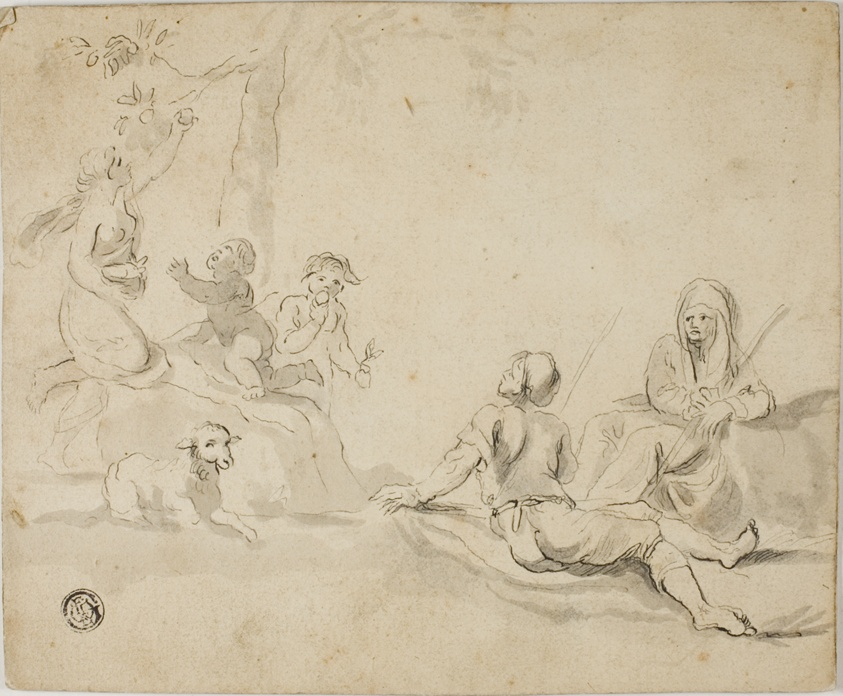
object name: Drawing and Watercolor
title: Apple Harvesters and Resting Shepherds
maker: Possibly after Salvator Rosa (Italian, 1615-1673); or possibly after Marco Ricci (Italian, 1676-1729)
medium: Pen and black ink, with brush and gray wash, on cream laid paper, laid down on gray card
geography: Italy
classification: pen and ink drawings; drawings (visual works); prints and drawing